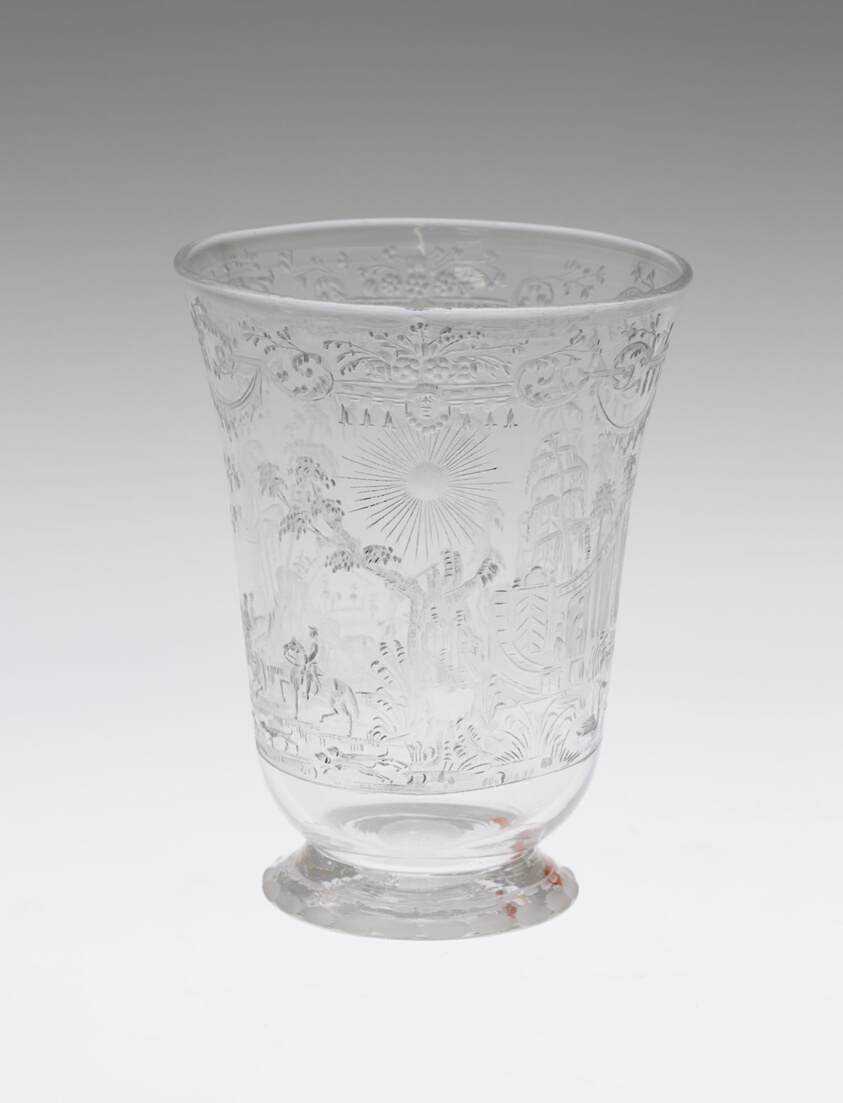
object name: Glass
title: Beaker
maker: Bohemia, Czech Republic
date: Early 18th century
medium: Glass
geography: Bohemia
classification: glass; european decorative arts